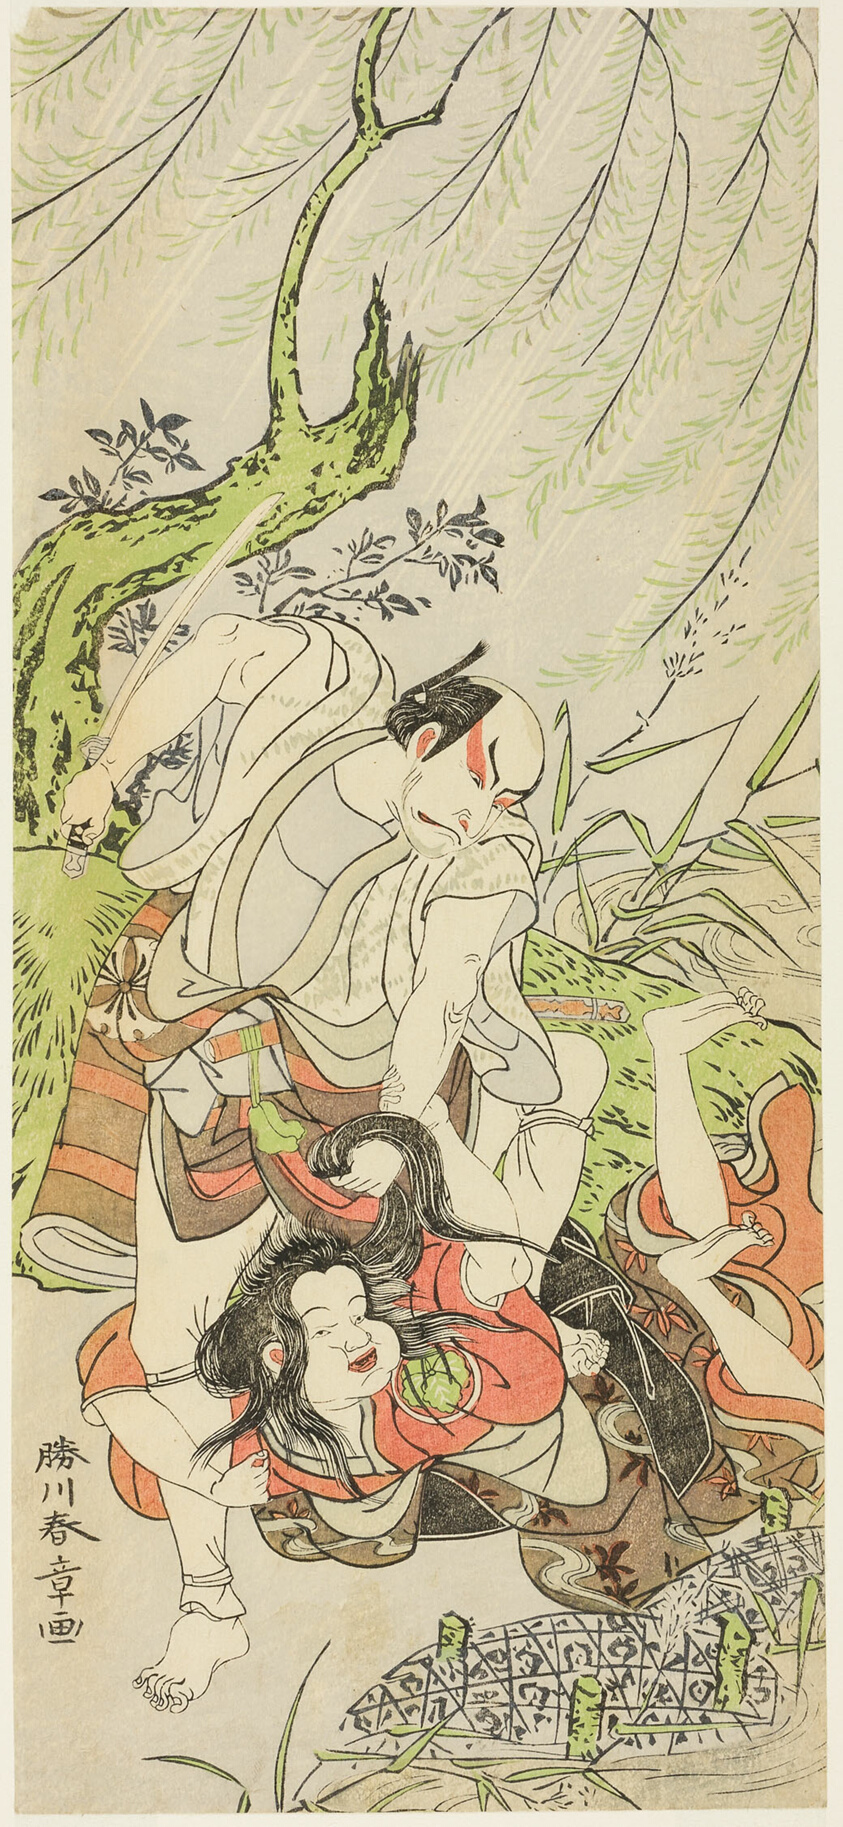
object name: Print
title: The Actors Matsumoto Koshiro II as Yoemon and Yoshizawa Sakinosuke III as Kasane, His Wife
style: Japanese (culture or style)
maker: Katsukawa Shunsho 勝川 春章; Japanese, 1726-1792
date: c. 1771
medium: Color woodblock print; hosoban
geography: Japan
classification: woodblock print; print; asian art